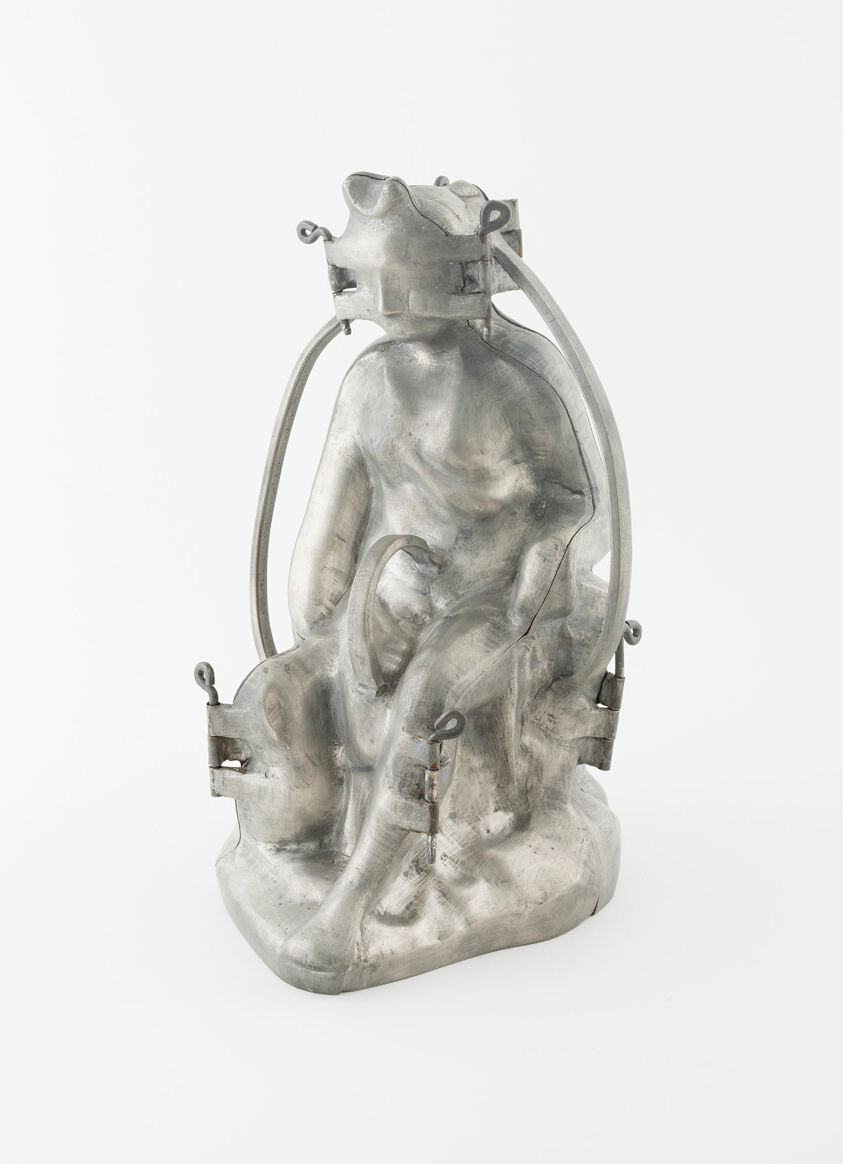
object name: Metalwork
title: Culinary Mold in the Form of a Seated Woman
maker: Continental Europe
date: 19th century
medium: Pewter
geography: Europe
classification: pewter; metalwork; european decorative arts